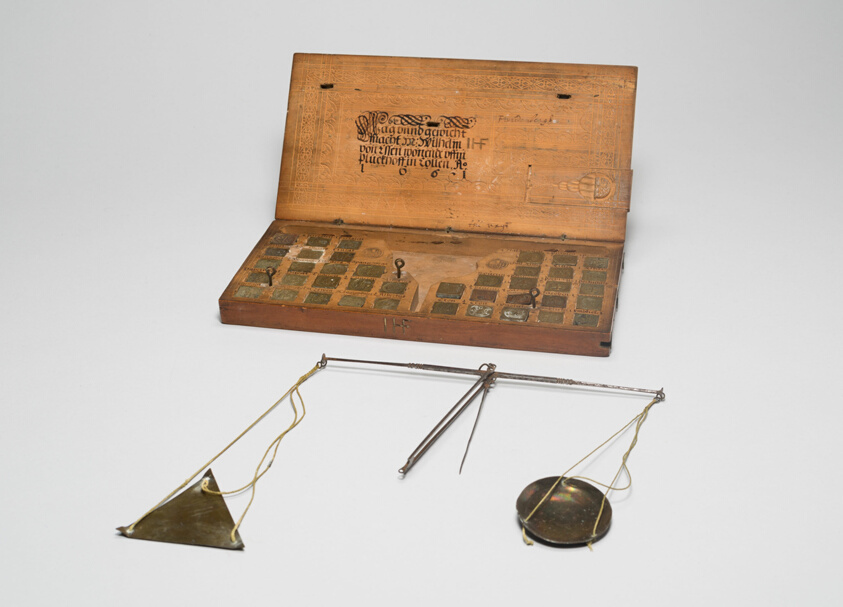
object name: Metalwork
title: Box with Scale and Set of Weights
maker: Wilhelm von Essen; German, 17th century; Pluckhoff, Cologne, Germany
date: 1661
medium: Wood, brass, iron, and copper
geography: Cologne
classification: tool; european decorative arts; metalwork